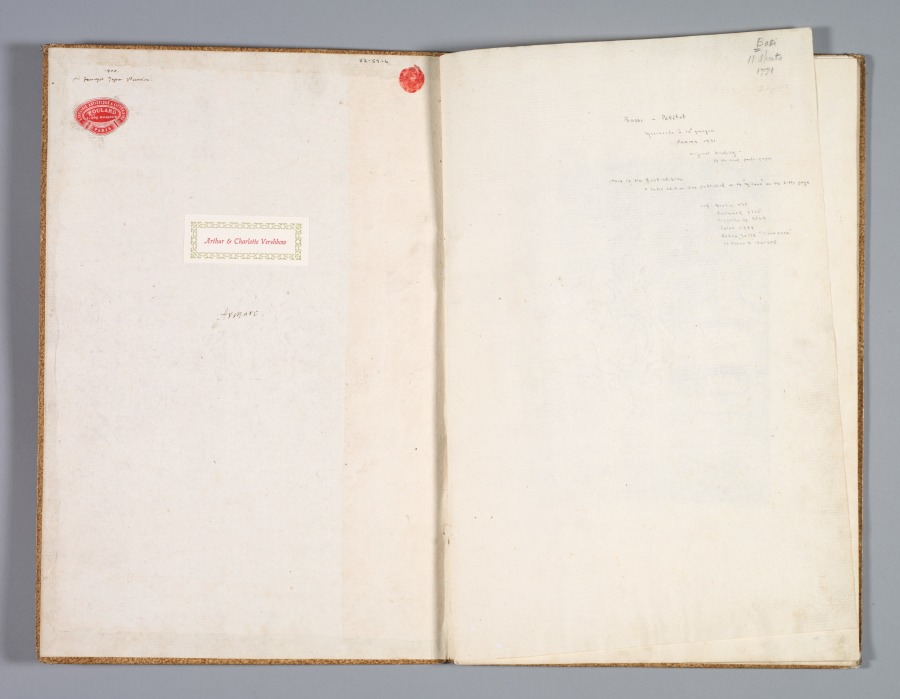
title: Mascarade à la Grecque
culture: Italy, 18th century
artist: after Benigno Bossi (Italian, 1727–1792)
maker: Ennemond Alexandre Petitot (French, 1727-1801)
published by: Benigno Bossi, Parma, 1771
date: 1771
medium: Set of 10 etchings, including the title page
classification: Print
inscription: On paper pasted to inside left cover: Upper left corner: red sticker, printed in white: LIBRAIRIE ARTISTIQUE & LITTERAIRE PARIS; FOULARD / 7 QUAI MALAQUAIS; white sticker, center, printed in red ink with green border: Charlotte and Arthur Vershbow; upper left corner, in black ink: 1800 / Francesco Tasta Vicenzio (sp?); upper right, in black in: 82-59-6; upper right, heart-shaped stamp in red ink; center, in brown ink: Armaro On paper opposite inside left cover, in graphite, two different handwritings: Bossi / 11 sheets / 1771 Bossi - Petitot / Mascarade à la grecque / Parma 1771 / original binding / 18th cent paste - paper / this is the first edition / a later edition was published with "Milano" on the title page / ref: Berlin 475 / Guilmard p. 225 / Lippenheif (sp?) 3560 / Estas 2234 / Cohen 70 178 "livre rare" / Le Blanc 186 - 205